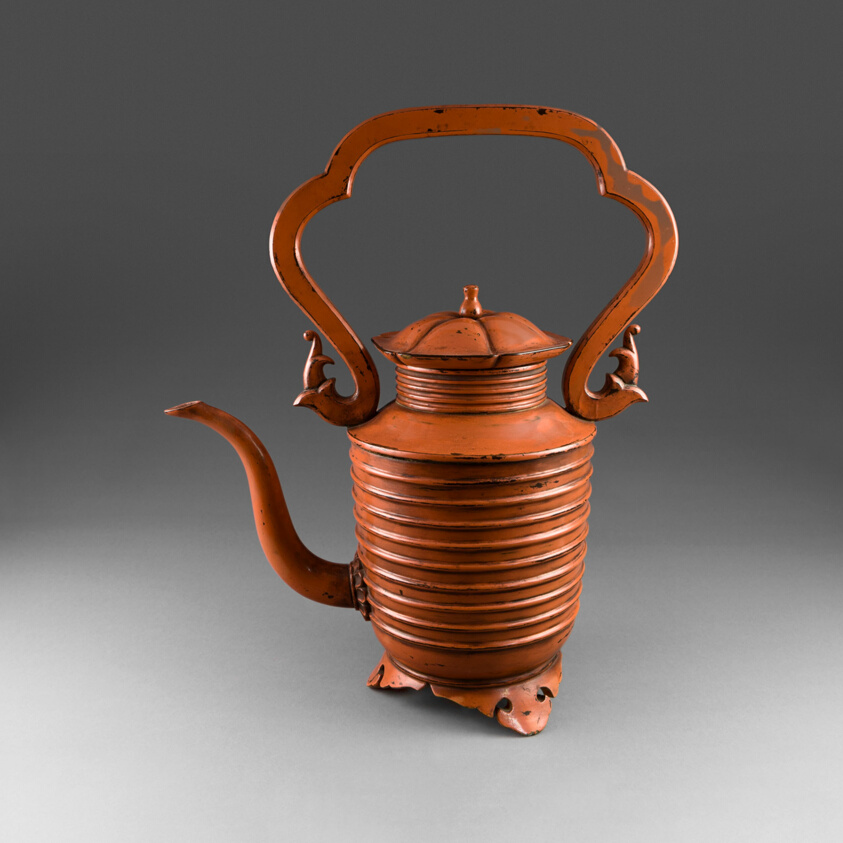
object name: Decorative Arts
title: Hot Water Pot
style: Japanese (culture or style)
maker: Japan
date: 16th century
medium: Lacquer on wood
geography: Japan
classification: lacquerware; asian art; decorative arts